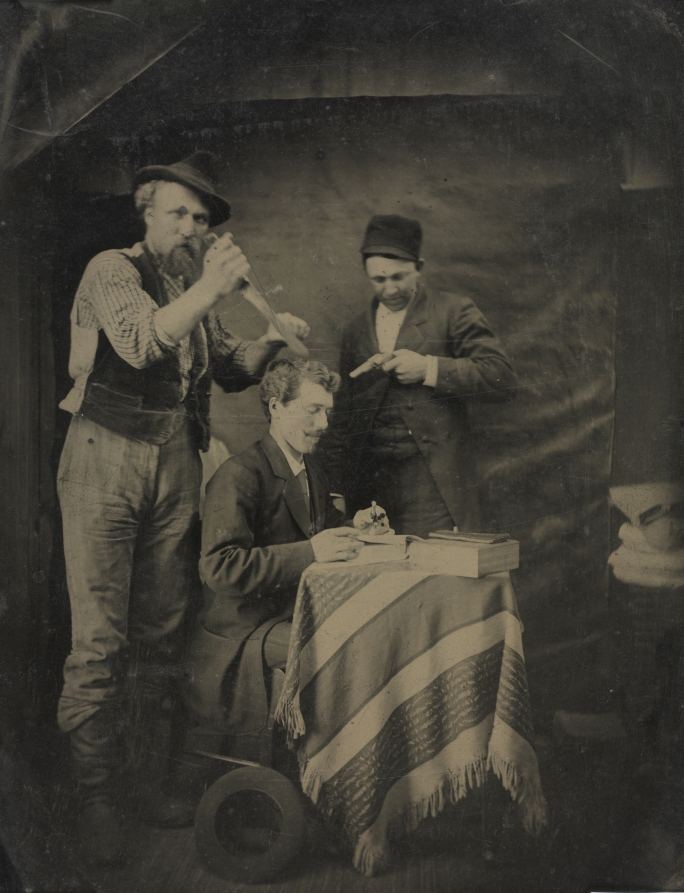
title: The Hold-Up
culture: American, 19th century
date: 1880s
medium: tintype, whole plate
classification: Photograph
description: Since the beginning of photography, objects and people have been purposefully arranged, or staged, for the camera. Popular in the late 1860s and 1870s, tintypes offered low prices and shortened exposure times. Perhaps because tintypists commonly worked at fairs and carnivals, frivolous images, such as this staged hold-up, became common. In these fictional scenes, all the participants were in on the joke. Some such scenes may be novelties, others may be gag portraits commissioned by groups of friends.